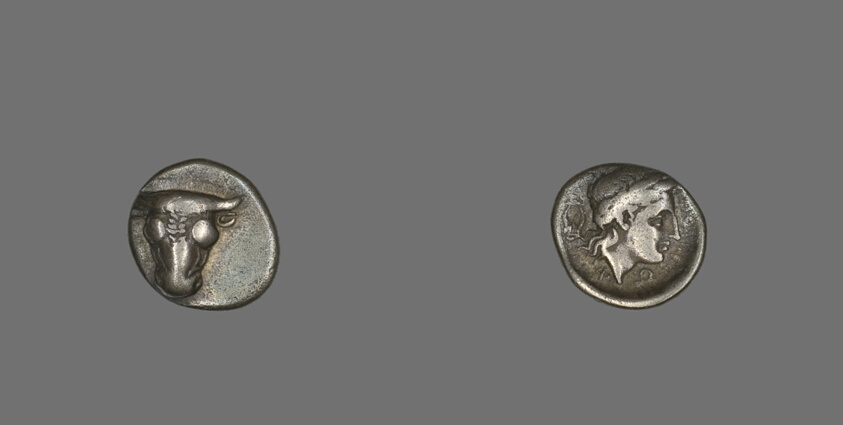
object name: Coin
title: Hemidrachm (Coin) Depicting Bucranium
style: greek, ancient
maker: Greek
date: 355-346 BCE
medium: Silver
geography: Greece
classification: coin; ancient art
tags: bull, mythological figures